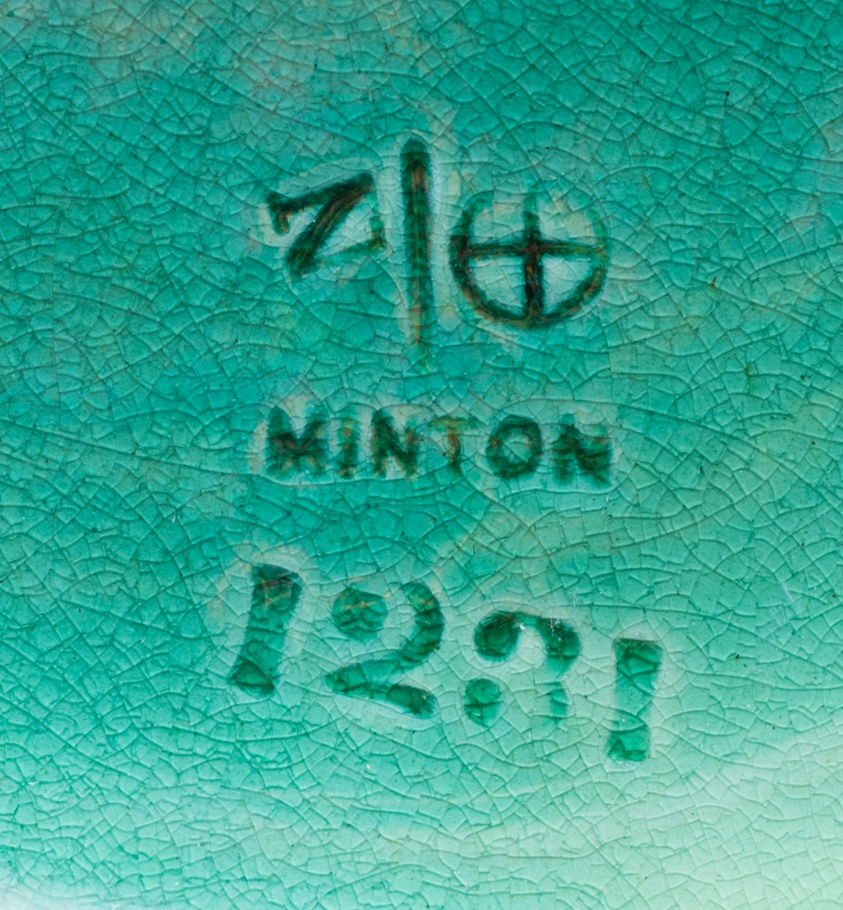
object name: Ceramics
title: Tower-Jug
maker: Minton Pottery and Porcelain Factory; Stoke-on-Trent, England, founded 1793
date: 1872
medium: Tin glazed earthenware with pewter mounts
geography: England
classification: ceramics